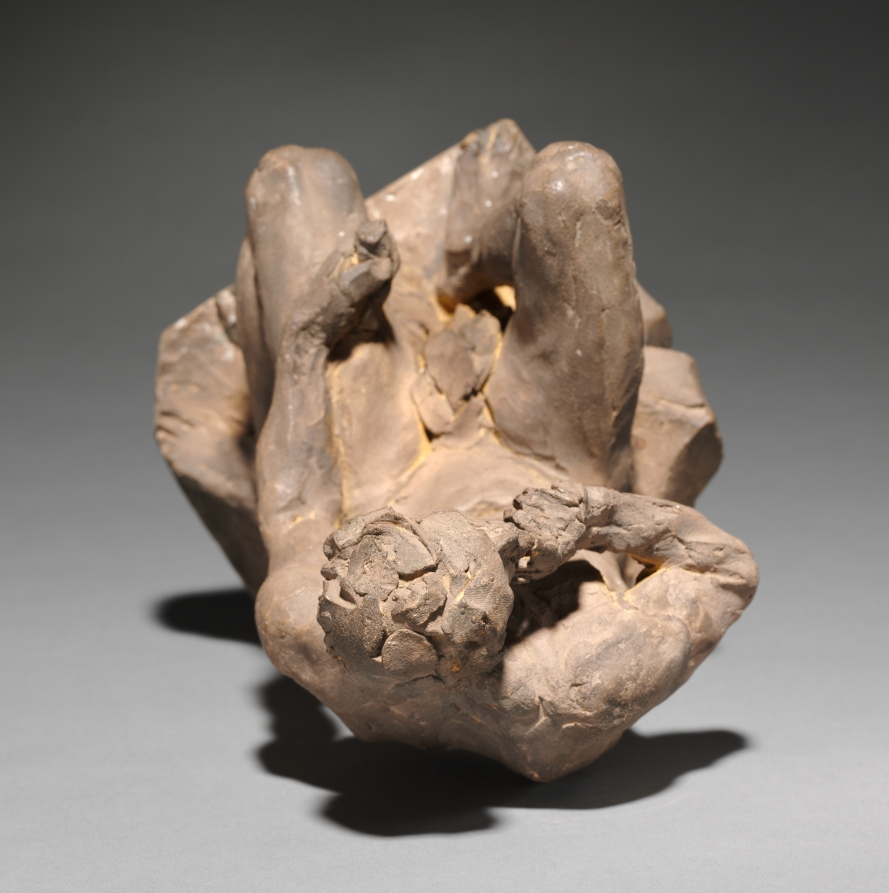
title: Study for "Silence"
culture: France, 18th century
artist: attributed to Louis-Philippe Mouchy (French, 1734–1801)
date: c. 1780–89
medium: terracotta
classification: Sculpture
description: When originally acquired this work was understood as a sketch for the "Citizen," a figure for a monument to King Louis XV in the French city of Rheims by Jean-Baptiste Pigalle. In that work the figure of the "Citizen" appears at the base, opposite an allegory of law, underneath a sculpture of Louis XV. The attribution was changed, however, after research made evident that the museum's sculpture precisely matches the iconography for "Silence." Moreover, the figure differs considerably from Pigalle's final figure of the "Citizen," throwing the attribution to Pigalle in question as well. The work is now believed to be by Pigalle's close follower, Mouchy, because of its similarity to a sculpture completed in 1789 for Madame Pompadour called Silence, which currently resides in the Luxembourg Palace in Paris.